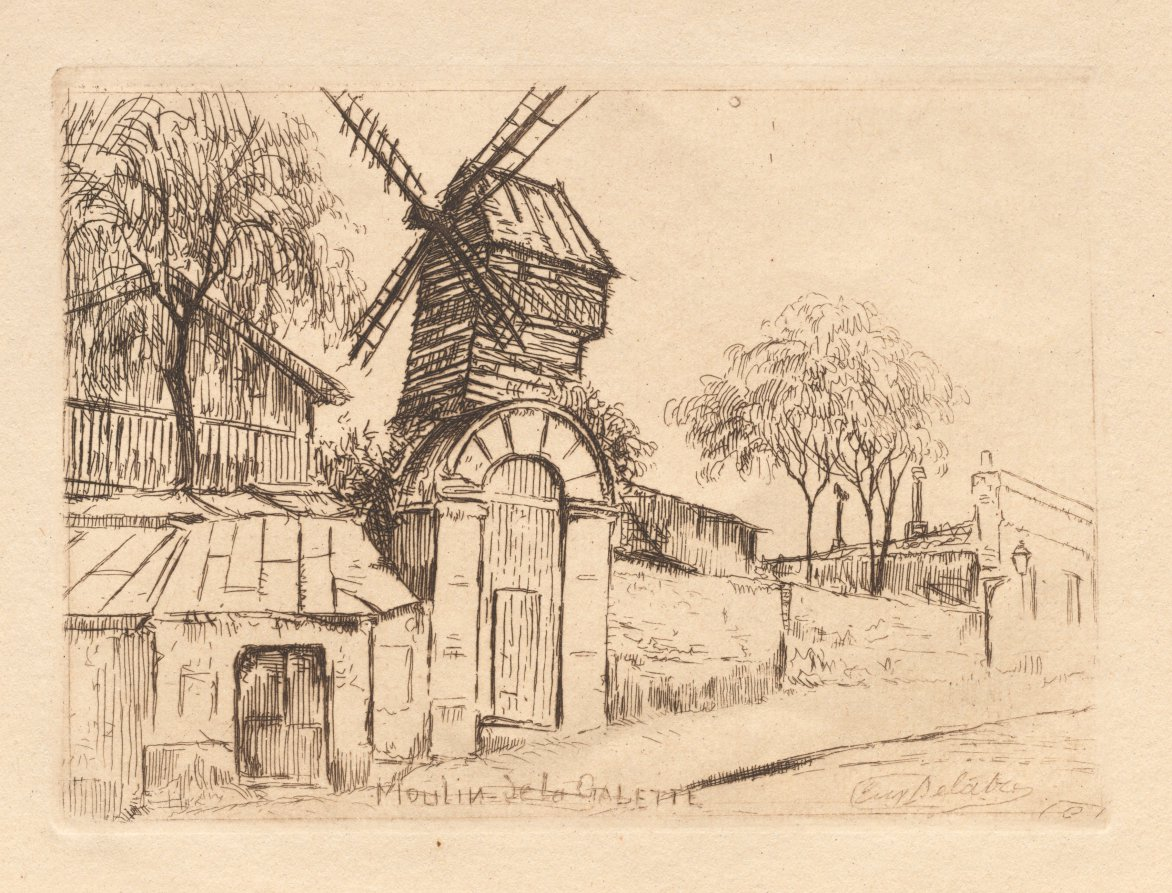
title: Moulin de la Galette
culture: France, 19th century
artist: Eugène Delâtre (French, 1864–1938)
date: c. 1910–20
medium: etching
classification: Print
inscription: inscribed, lower center, in plate: Moulin de la Galette signed lower right in plate: Eug. Delatre